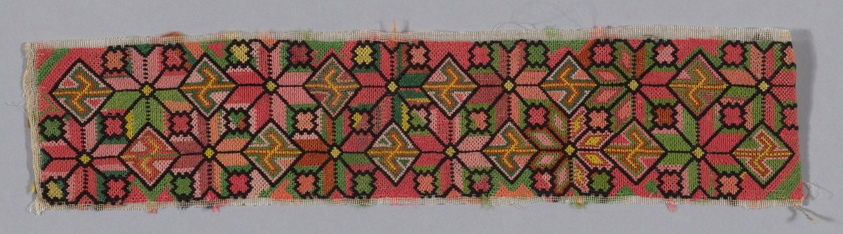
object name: Costume and Accessories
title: Band (for Woman's Trousers or Robe)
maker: China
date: 1875/1900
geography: China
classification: costume - needlework; needlework (visual works); costume